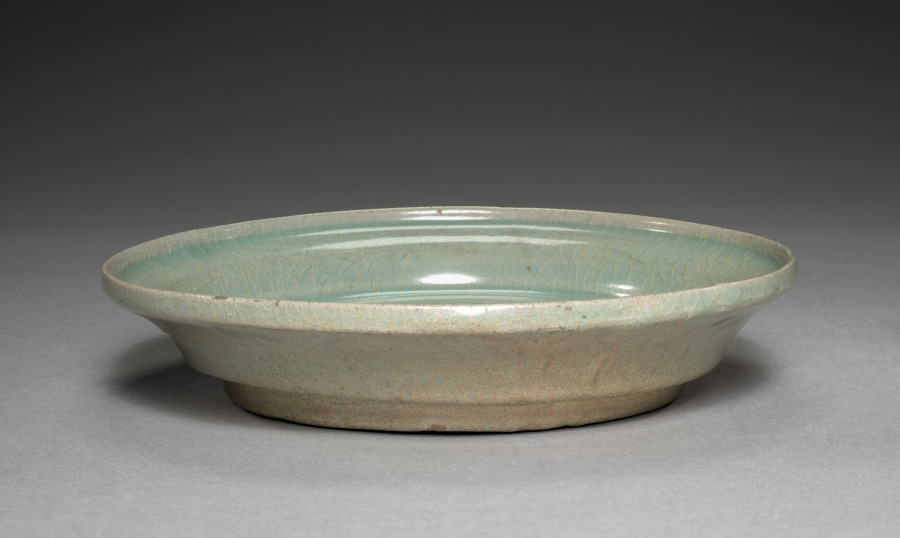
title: Saucer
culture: Korea, Goryeo dynasty (918–1392)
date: 1100s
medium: pottery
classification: Ceramic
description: As early as the seventh century, the practice of drinking tea and wine became an important part of elite culture in Korea. Elites of the Goryeo period commissioned a variety of types of utensils and vessels including this saucer paired with a large bowl, to make their drinking experience more exciting.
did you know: The crackle pattern that appears all over this saucer was caused by a thermal expansion mismatch between the body and the glaze.